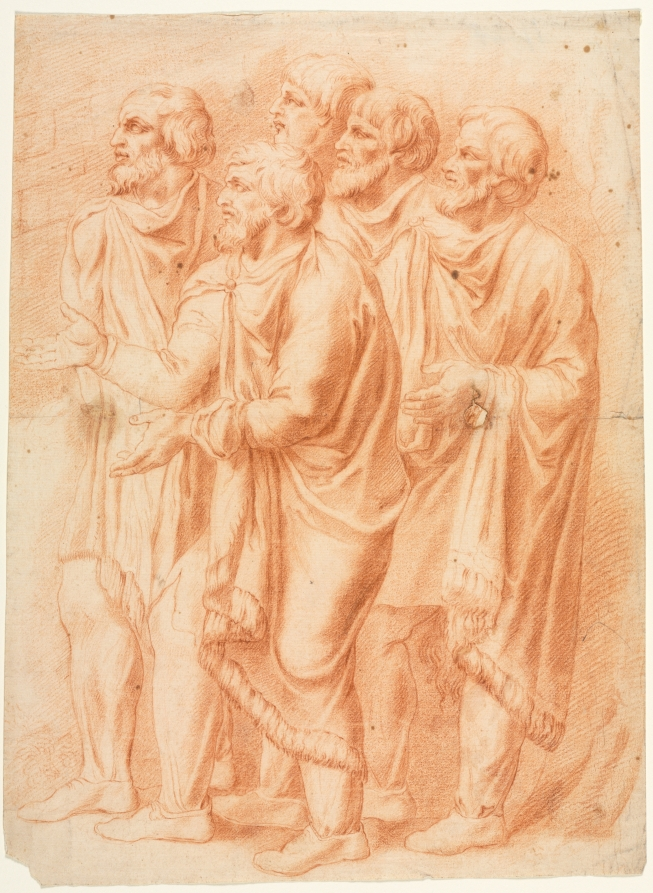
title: The Suppliants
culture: France, 18th century (?)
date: 18th century?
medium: red chalk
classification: Drawing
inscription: VERSO, upper left, in graphite: 25ºº ; upper left, in black crayon: M 84 [crossed out in graphite] ; upper right, in red pencil: A82 25ºº ; lower left, in graphite: 82 [circled] ; lower left, in graphite: 2066 [crossed out] ; lower right, in graphite: 9 [partially erased]